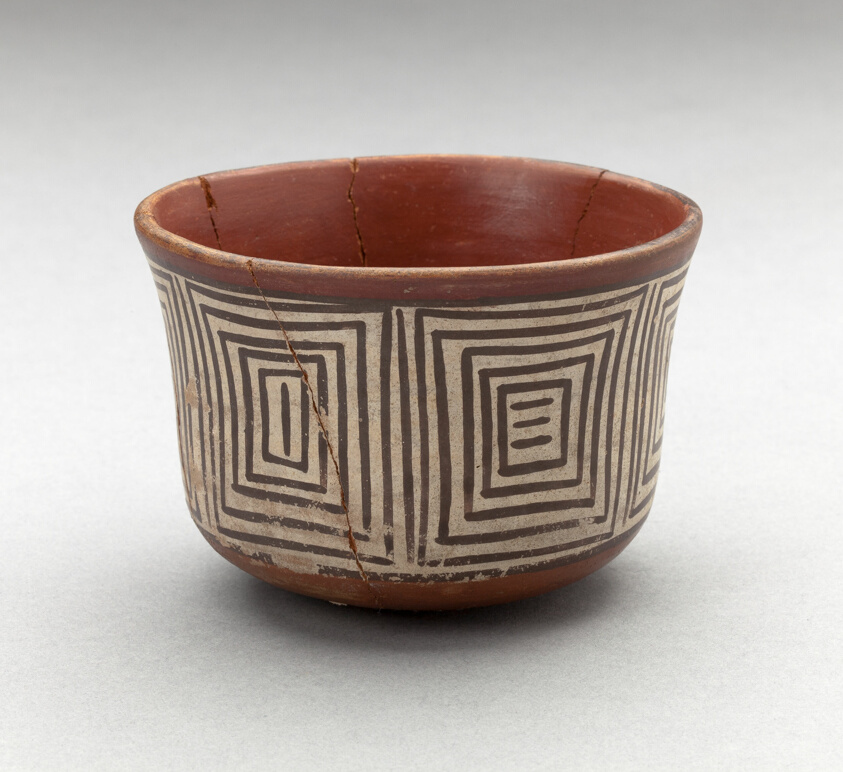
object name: Vessel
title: Bowl with Repeated Concentric Squared Motifs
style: nazca, early intermediate period, Pre-Columbian, americas, Arts of the Americas, andean, andes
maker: Nazca; South coast, Peru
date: 180 BCE–500 CE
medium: Ceramic and pigment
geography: Nazca Valley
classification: bowl; earthenware; art of the americas; ceramics; vessel